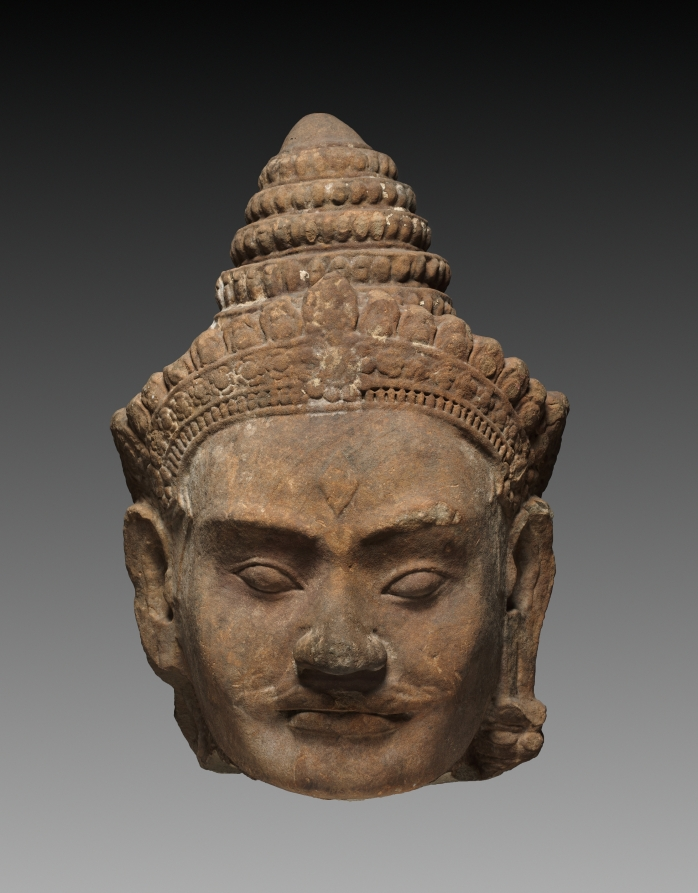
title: Colossal Head of a Deva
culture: Cambodia, Angkor, Preah Khan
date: c. 1200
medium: sandstone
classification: Stone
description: This head is from one of the gods (devas in Sanskrit) who, according to Hindu myth, churned the primordial Ocean of Milk to extract the nectar of immortality. Using a mountain as a churning rod and a serpent as the rope, the gods on one side and the demons on the other vied to win the nectar. The gods prevailed and achieved immortality.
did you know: The deity’s conical tiara consists of a diadem with floral decoration and is topped by a five-tiered lotus narrowing upward.